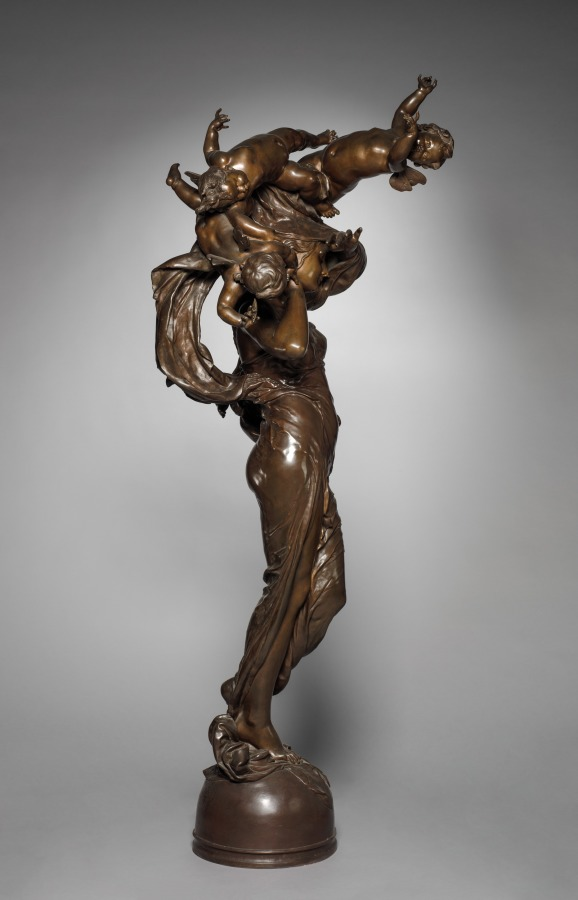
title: Dawn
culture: France, 19th century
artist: Gustave-Joseph Chéret (French, 1838–1894)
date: c. 1883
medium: bronze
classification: Sculpture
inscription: signed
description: This sculpture is of the same design as one exhibited by Chéret at the Paris Salon of 1883.